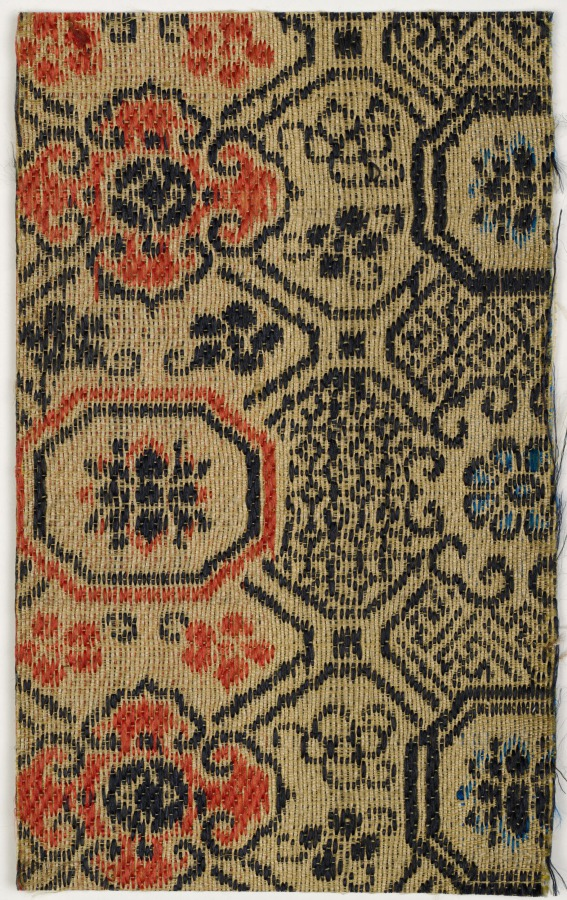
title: Textile Fragment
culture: Japan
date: 1800s-early 1900s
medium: silk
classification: Textile